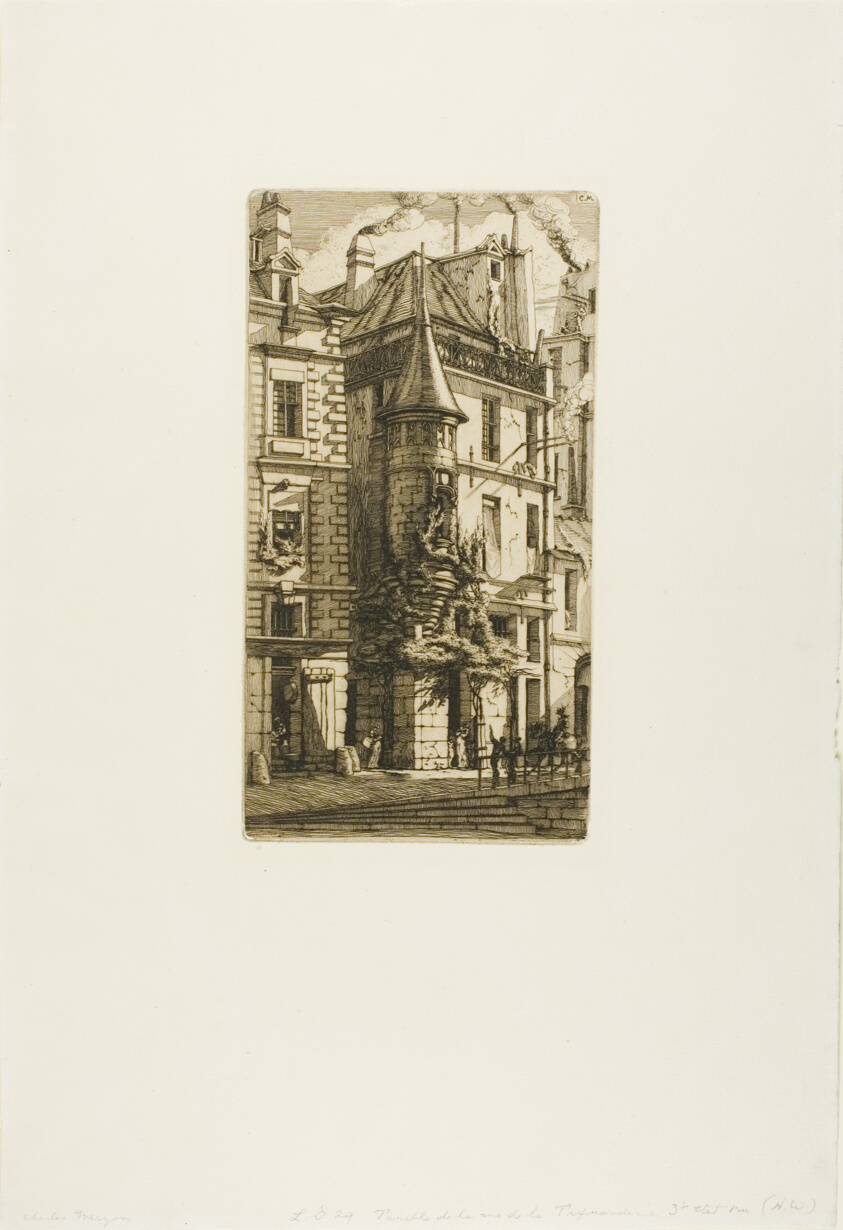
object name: Print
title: House with a Turret, rue de la Tixéranderie, Paris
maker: Charles Meryon (French, 1821-1868)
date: 1852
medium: Etching on ivory wove paper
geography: France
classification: etching; print; prints and drawing